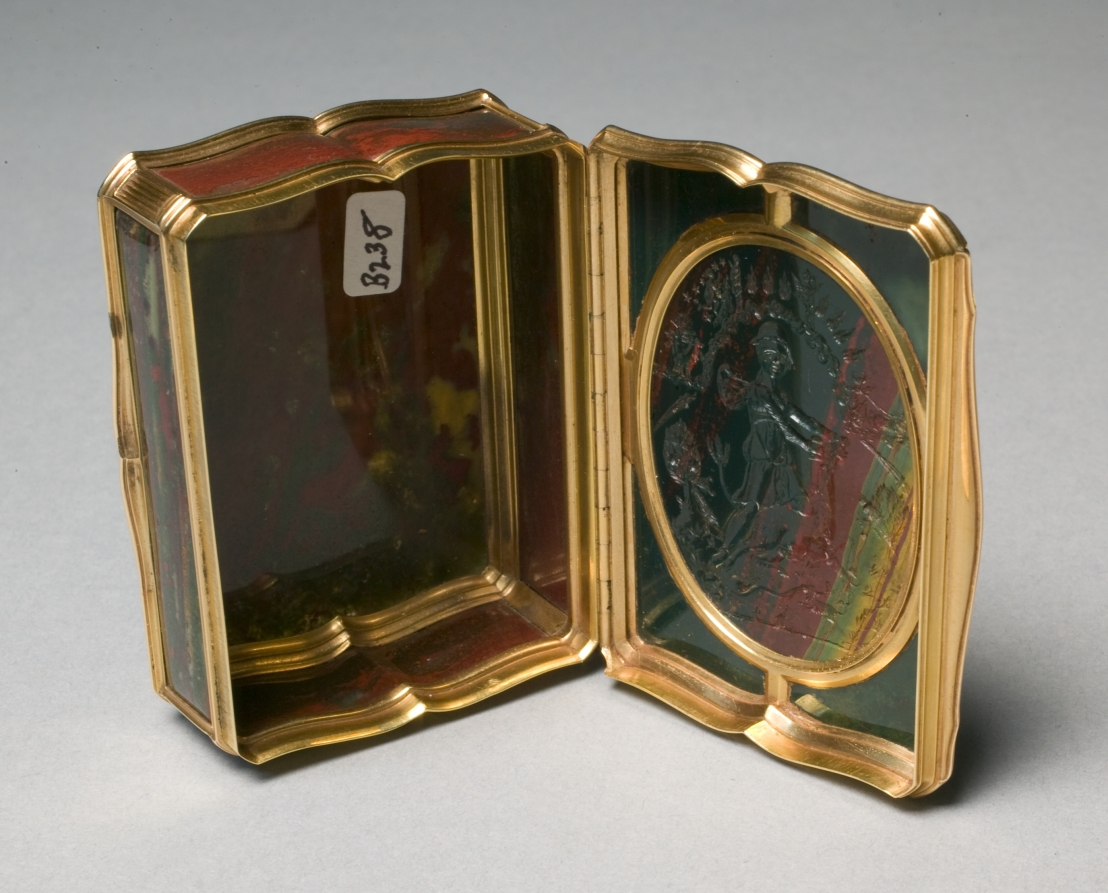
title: Snuff Box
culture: France, Paris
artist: Noel Hardivilliers (French)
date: 1732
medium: hardstone, jasper panels, gold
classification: Miscellaneous